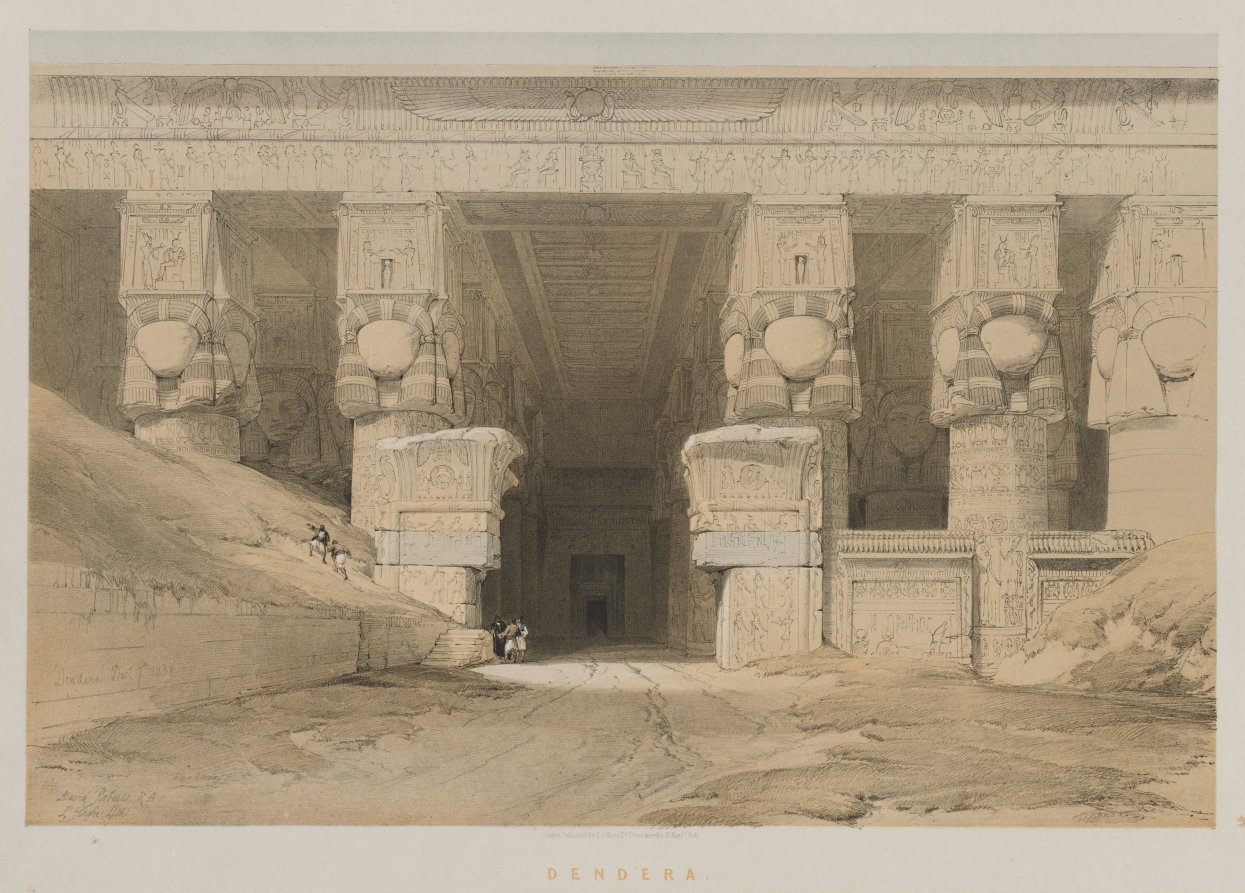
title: Egypt and Nubia, Volume I: Dendera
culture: England, 19th century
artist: Louis Haghe (British, 1806–1885)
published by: F. G. Moon (British, 1797–1871)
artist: after David Roberts (Scottish, 1796–1864)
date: 1847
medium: color lithograph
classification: Print